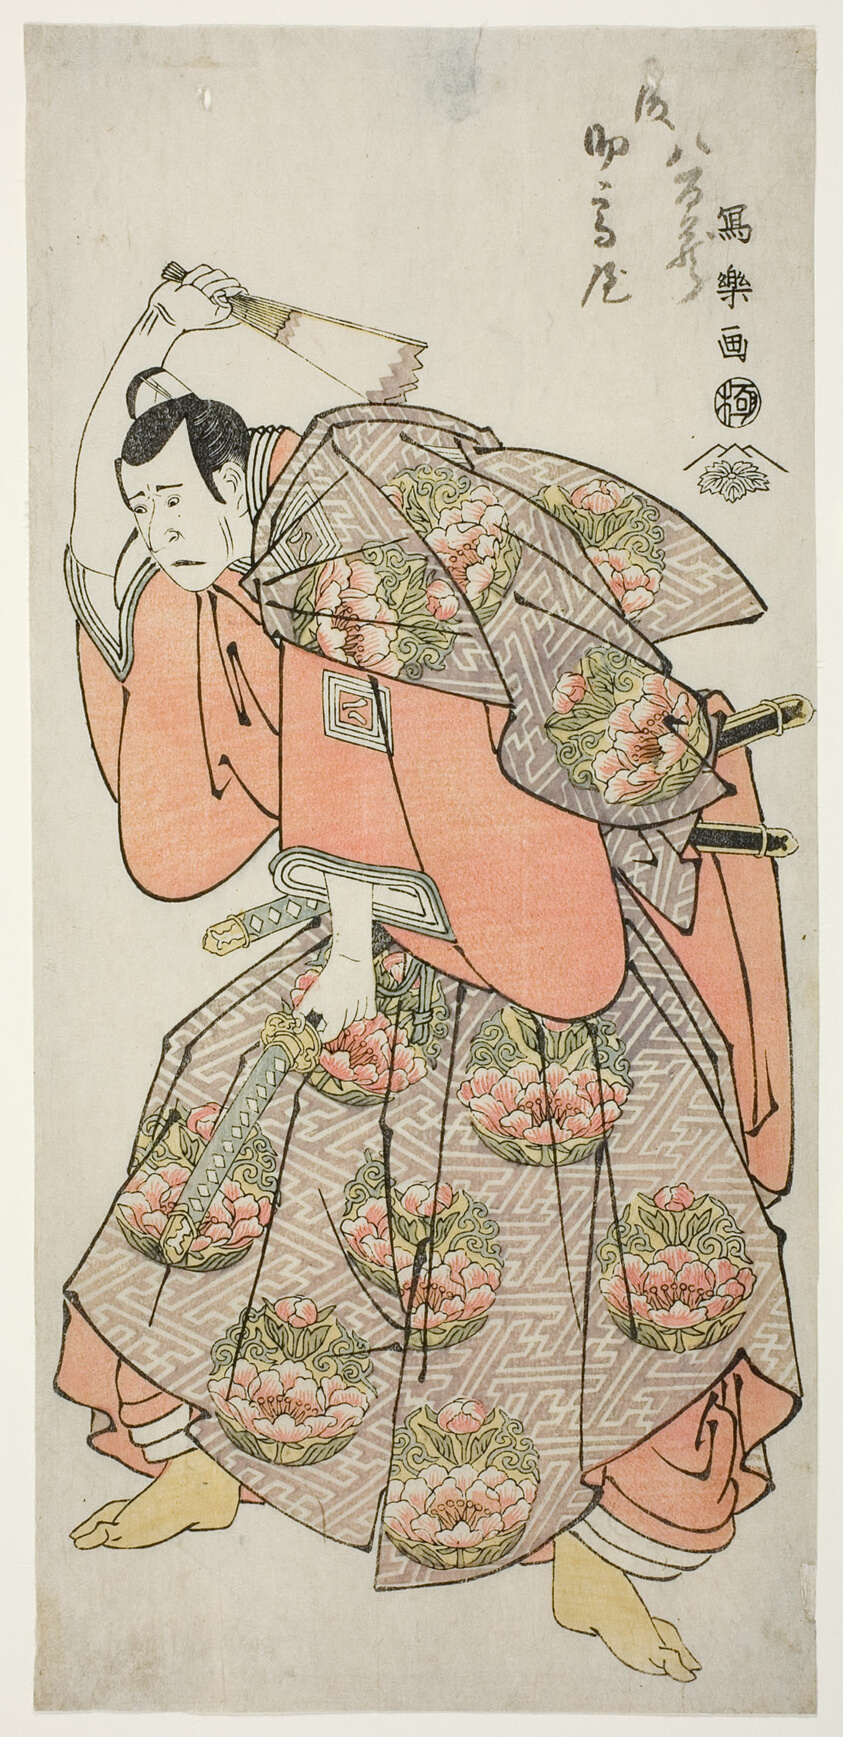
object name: Print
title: The Actor Ichikawa Yaozo III as Saeki Kurando Tsunenori (Sandai-me Ichikawa Yaozo no Saeki Kurando Tsunenori)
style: Japanese (culture or style)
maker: Toshusai Sharaku 東洲斎 写楽; Japanese, active 1794-95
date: 1794 (Kansei 6)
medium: Color woodblock print; hosoban, nishiki-e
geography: Japan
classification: woodblock print; print; asian art